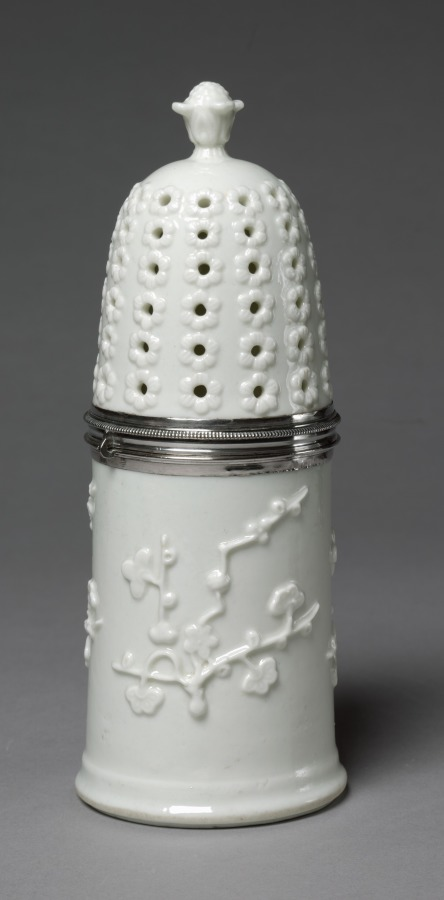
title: Caster (Saupoudreuse)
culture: France, Saint Cloud, 18th century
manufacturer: Saint Cloud Porcelain Factory (French)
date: c. 1732–38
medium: soft-paste porcelain, silver mount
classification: Ceramic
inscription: [Discharge mark of Hubert Louvet, 1732-1738 (Dog's head in profile), on both sections of silver mount]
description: This cylindrical caster with a removable pierced cover may have held sugar. It likely derives its form from silver casters manufactured pre-1700. Its all-white, molded, prunus branch decorations are characteristic of blanc de chine, the term used in France to reference the highly prized porcelain produced in the southeastern Fujian province of Dehua, China, known for its pure color and high degree of translucence.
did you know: Prunus branches, which refer to flowering trees and shrubs including plums, cherries, peaches, nectarines, apricots, and almonds, were a common motif in Chinese porcelain.